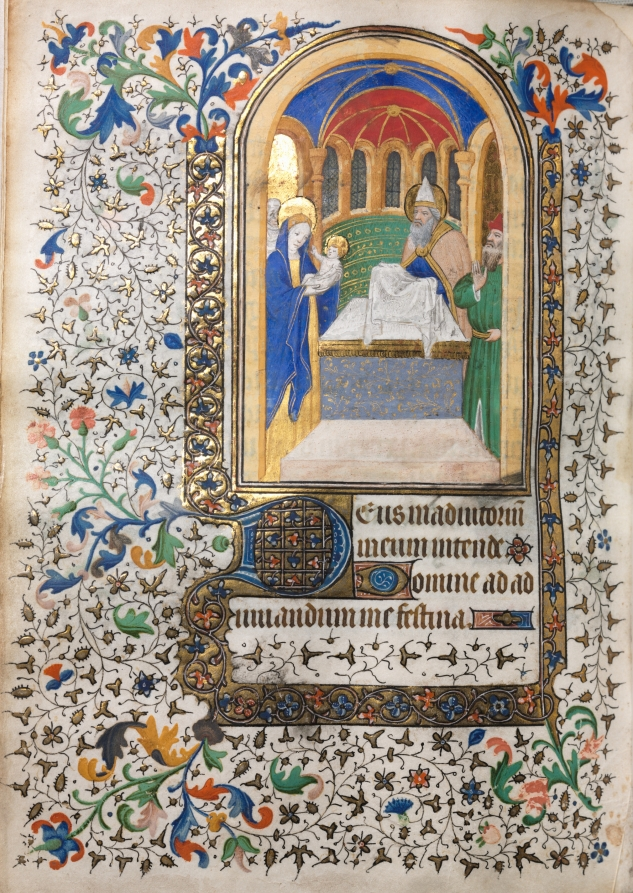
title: Book of Hours (Use of Paris): Presentation at the Temple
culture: France, Paris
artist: follower of Boucicaut Master (French, Paris, active about 1410–25)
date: c. 1420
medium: ink, tempera, and gold on vellum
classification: Bound Volume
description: The Guise Master-named after the book of hours he illustrated for François de Lorraine, Duke of Guise-developed his style from the more dominant Parisian workshop of the Boucicaut Master.